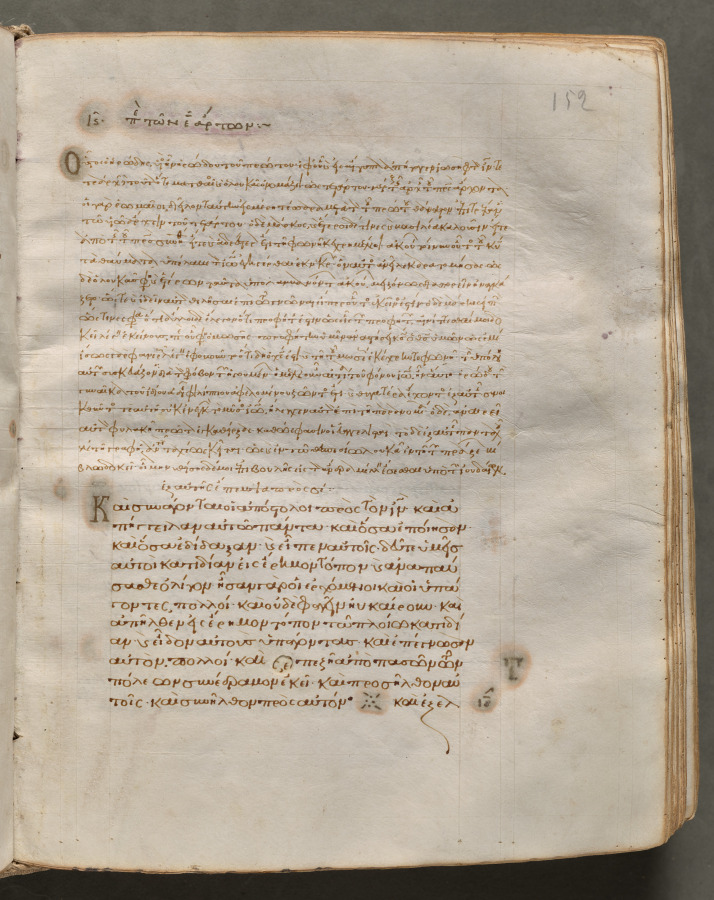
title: Text, folio 152 (recto), from a Gospel Book with Commentaries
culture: Byzantium, Constantinople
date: c. 1000–1100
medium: ink, tempera, and gold on vellum; leather binding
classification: Bound Volume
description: Each of the four gospels in this book opens on a page with brilliantly illuminated borders depicting the author of the text as well as birds-principally peacocks, symbols of the immortality of the soul-and fountains, representing the fountain of life and the salvation of the soul. This volume consists of 428 leaves with texts in Greek. Its level of sophistication suggests that it was probably written and decorated in a monastery in Constantinople.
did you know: Gospel Books were carried in procession through Byzantine churches.